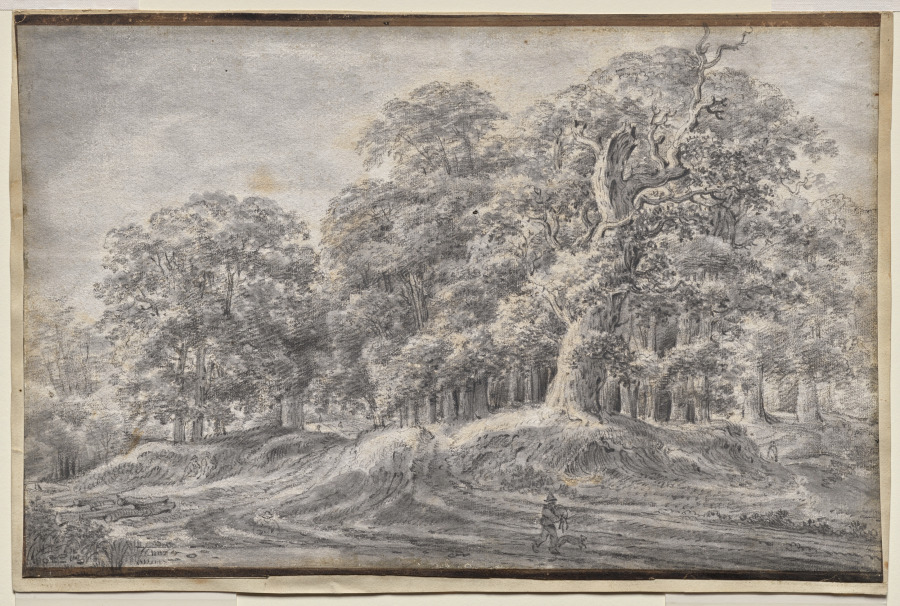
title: A Track on the Edge of a Wood with a Peasant Carrying Sheep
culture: Netherlands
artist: Anthonie Waterloo (Dutch, 1609/10–1690)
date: after 1640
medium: Charcoal and wetted charcoal and gray wash on cream laid paper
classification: Drawing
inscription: Written in pencil on verso of mount: "[illegible/illegible]"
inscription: Written in pencil on verso of mount: ""//"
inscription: Written in pencil on verso of mount: "258 x 397"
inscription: Written in pencil on verso of mount: "Reg. Christie's/sale 8.XII.76 lot 55/[illegible]=935 [illegible/illegible] Anthonie Waterloo/ex coll Dowager Lady Riser (?)/Louisa Ri [illegible] 1812 Joseph [illegible] of [illegible]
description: Known exclusively for his drawings and prints, the Dutch artist Anthonie Waterloo specialized in tree studies and dense forest scenes such as this drawing. The vista here was probably made when he visited the Veluwe region of the Netherlands, in the southern province of Gelderland along the Rhine, in the 1640s. The landscape there was known for its woodlands, heathland, panoramic views, and sand drift, producing vistas drastically different than those of the flat, northwestern Netherlandish provinces. Waterloo's technique of using wet charcoal over dry chalk produced the effect of shimmering light and movement across the complex group of trees that are the feature of the drawing. Waterloo made and sold his drawings as finished works of art.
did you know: This drawing likely depicts the sandy, wooded region of Veluwe in the southern part of the Netherlands.